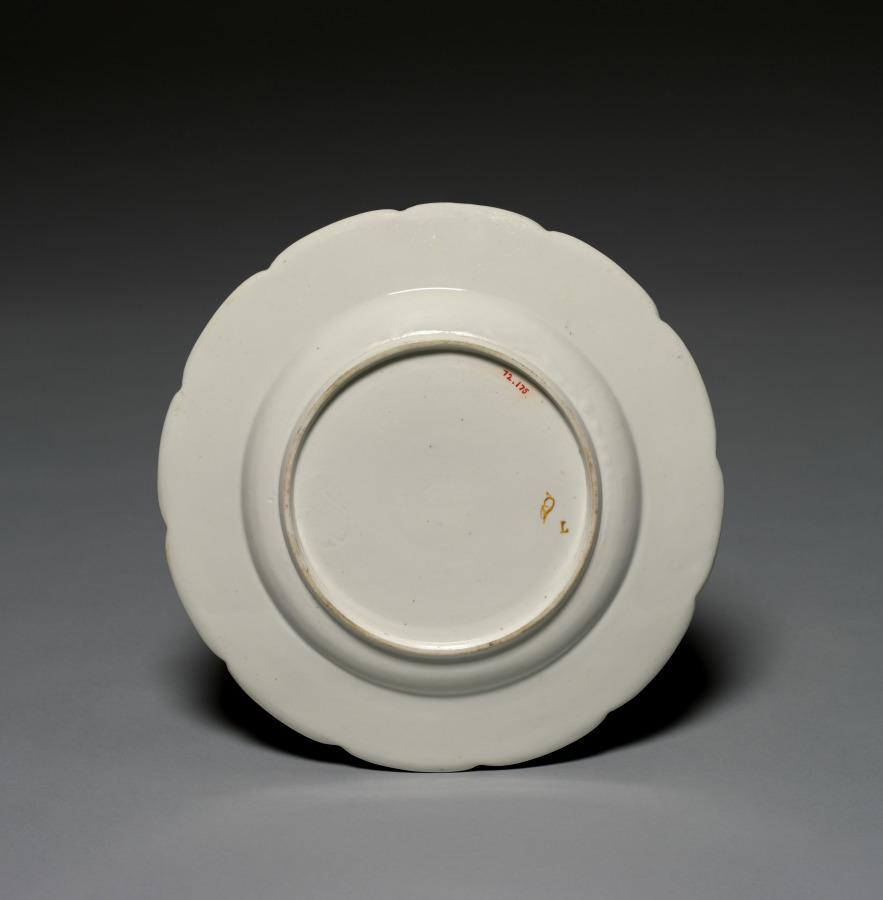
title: Plate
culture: France, Chantilly, 18th century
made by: Chantilly Porcelain Factory (French)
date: c. 1765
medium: soft-paste porcelain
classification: Ceramic